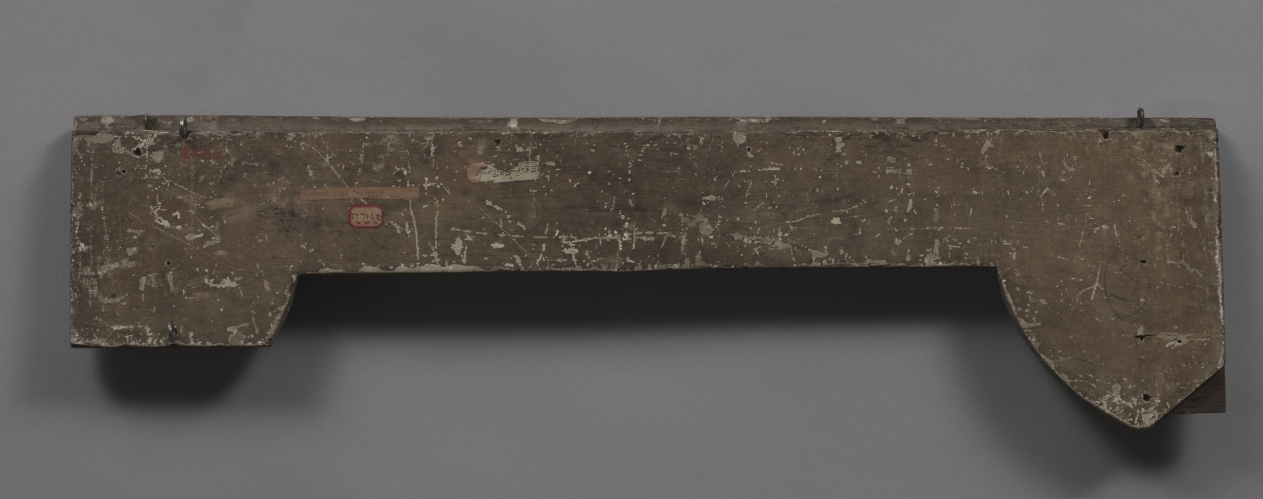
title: Panel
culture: France, Regency Period, 18th Century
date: 1715–1723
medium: wood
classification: Furniture and woodwork